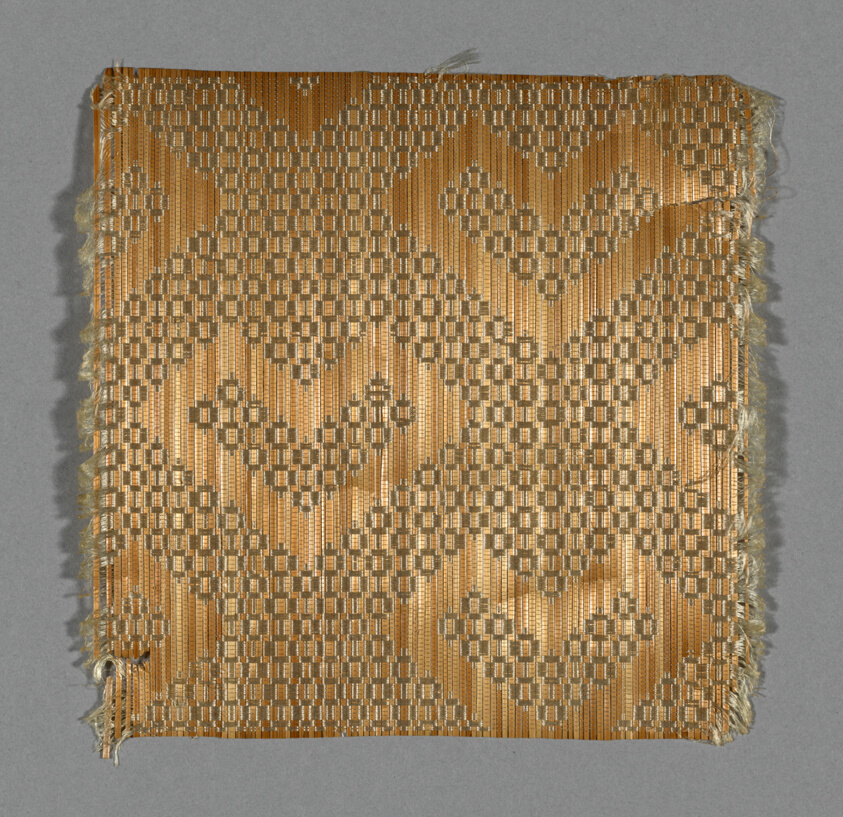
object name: Textile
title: Sample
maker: France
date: c. 1835/40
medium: Silk and straw, plain weave with supplementary patterning warps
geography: France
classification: textile; weaving